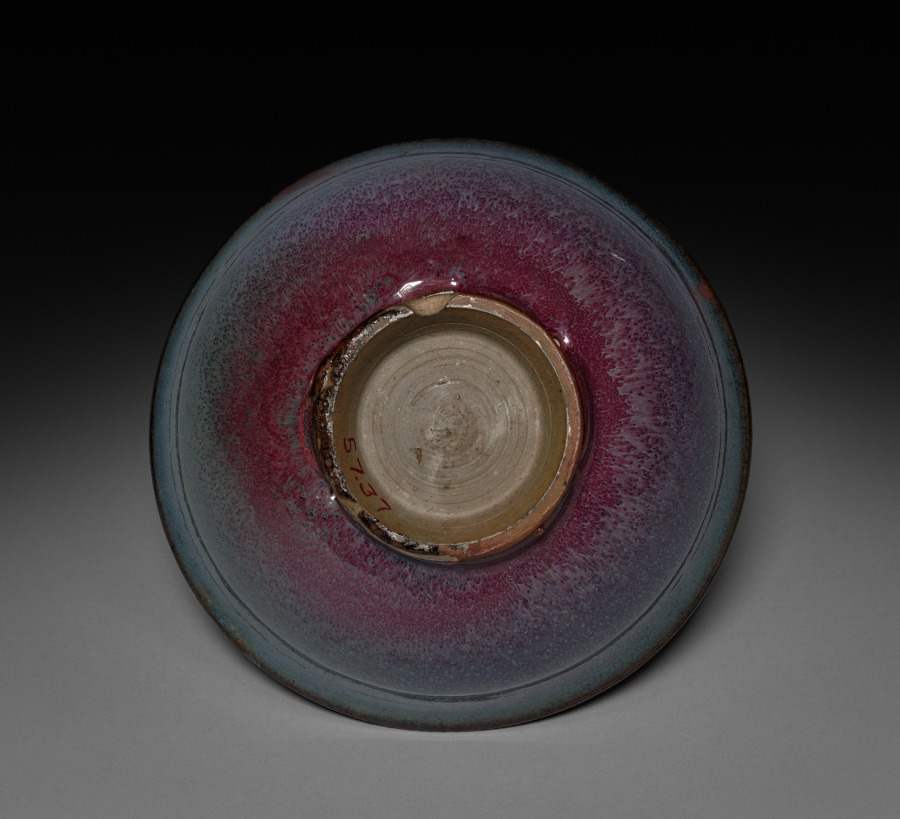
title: Bowl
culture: North China, Yuan dynasty (1271-1368) - Ming dynasty (1368-1644)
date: 1300s–1400s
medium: Glazed gray stoneware, Jun ware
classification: Ceramic